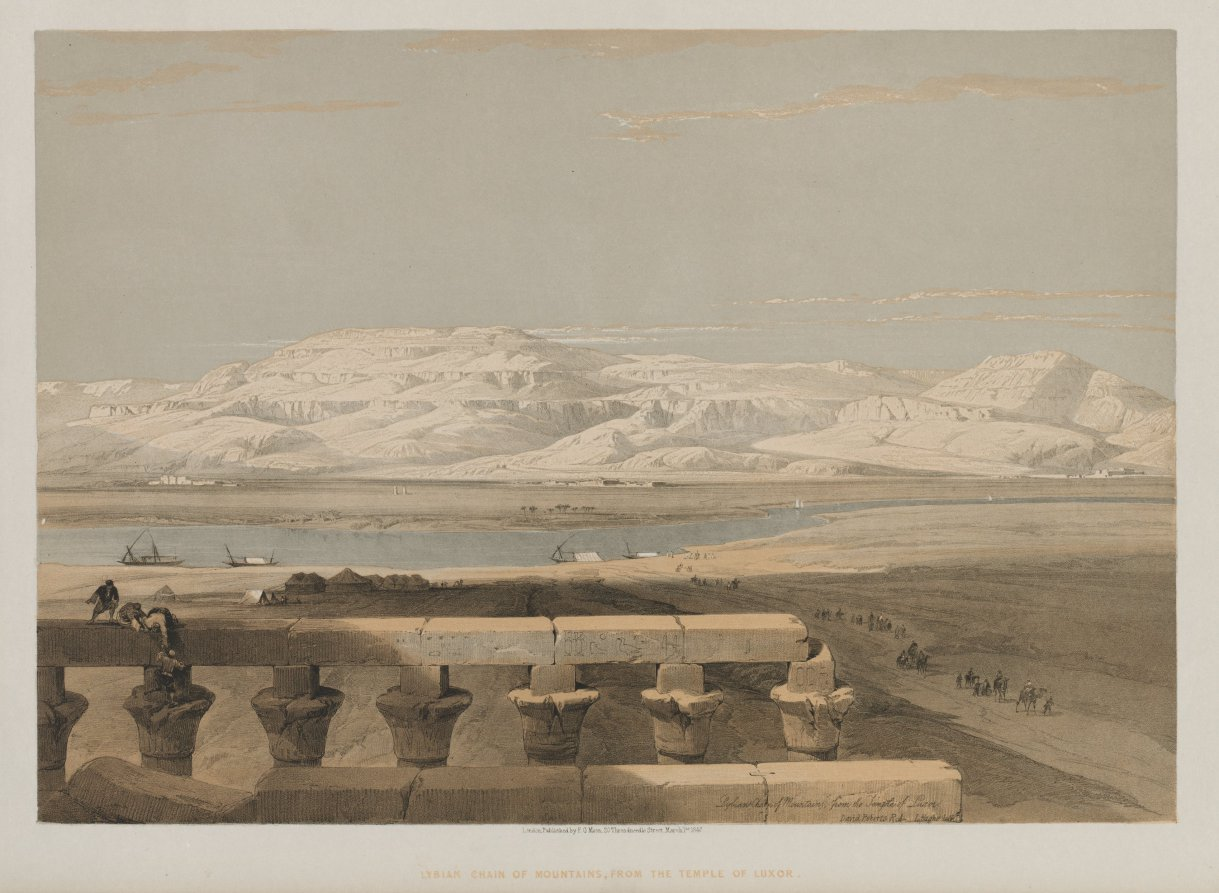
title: Egypt and Nubia, Volume I: Libyan Chain of Mountains, from the Temple of Luxor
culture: England, 19th century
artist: Louis Haghe (British, 1806–1885)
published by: F. G. Moon, 20 Threadneedle Street, London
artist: after David Roberts (Scottish, 1796–1864)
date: 1847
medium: color lithograph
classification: Print